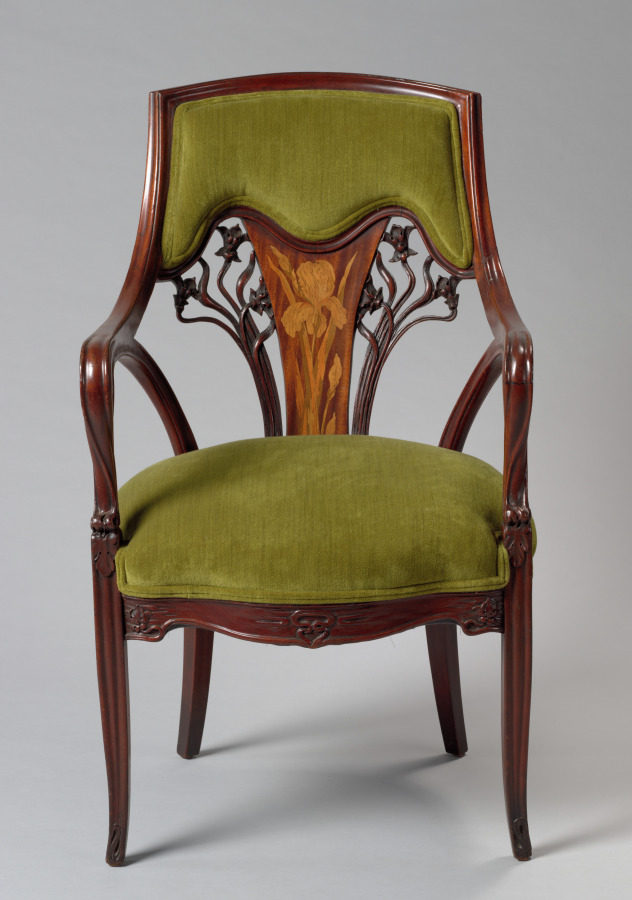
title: Chair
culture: France, Nancy ?, early 20th Century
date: c. 1900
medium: mahogany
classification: Furniture and woodwork